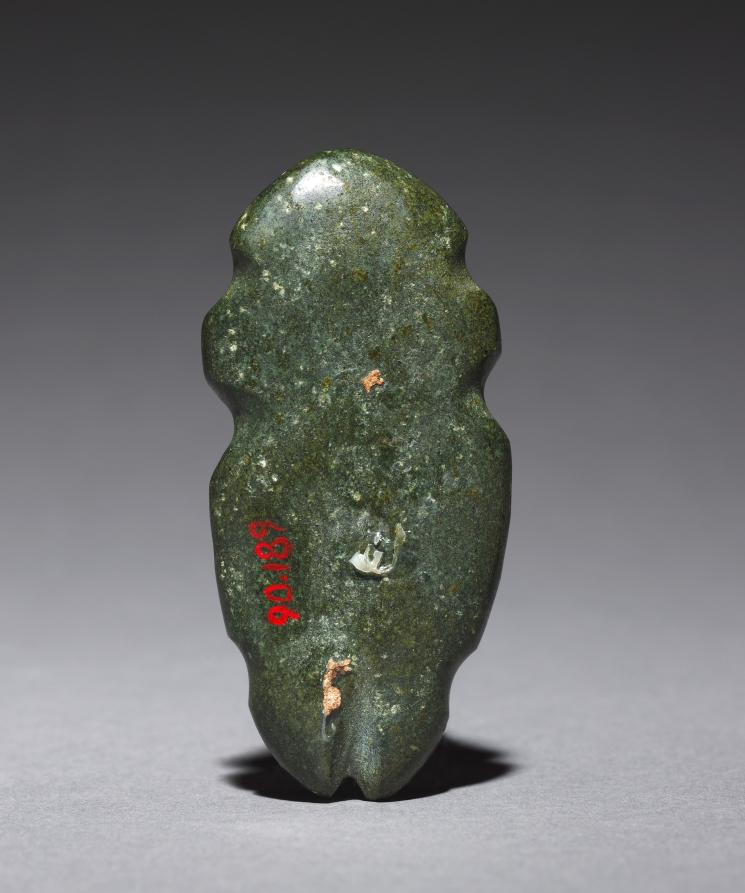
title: Axe Figure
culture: Mesoamerica, Mexico, Guerrero, Mezcala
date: 100 BCE–300 CE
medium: serpentine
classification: Sculpture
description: The Mezcala style takes its name from a river in its homeland, the Guerrero region of western Mexico. The style is known for small-scale sculptures characterized by sleek abstraction and often made of greenstone, one of the most precious materials that Mesoamerican artists worked. Unfortunately, little is known of the sculptures’ meanings and archaeological contexts.